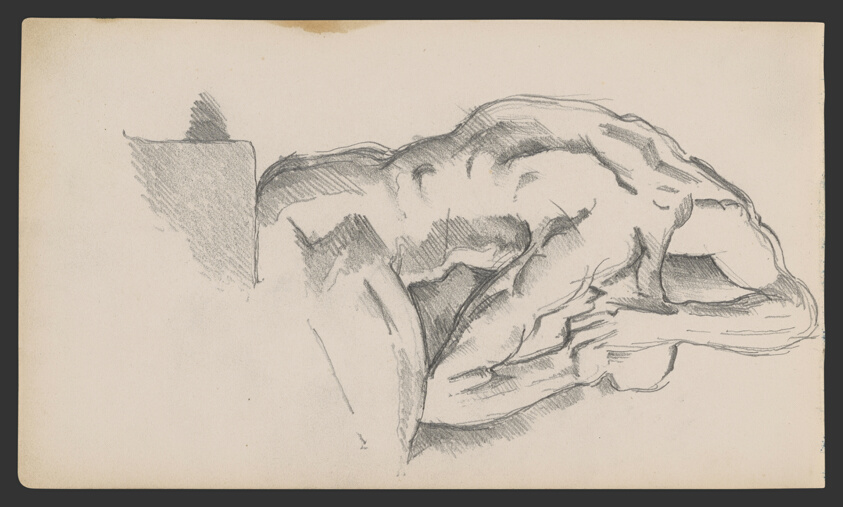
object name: Drawing and Watercolor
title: Sketchbook No. 2 (L'Estaque)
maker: Paul Cézanne; French, 1839-1906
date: 1875–86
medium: Graphite and pen and ink drawings on paper, bound into a book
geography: France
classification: sketchbook; graphite; prints and drawing; paper